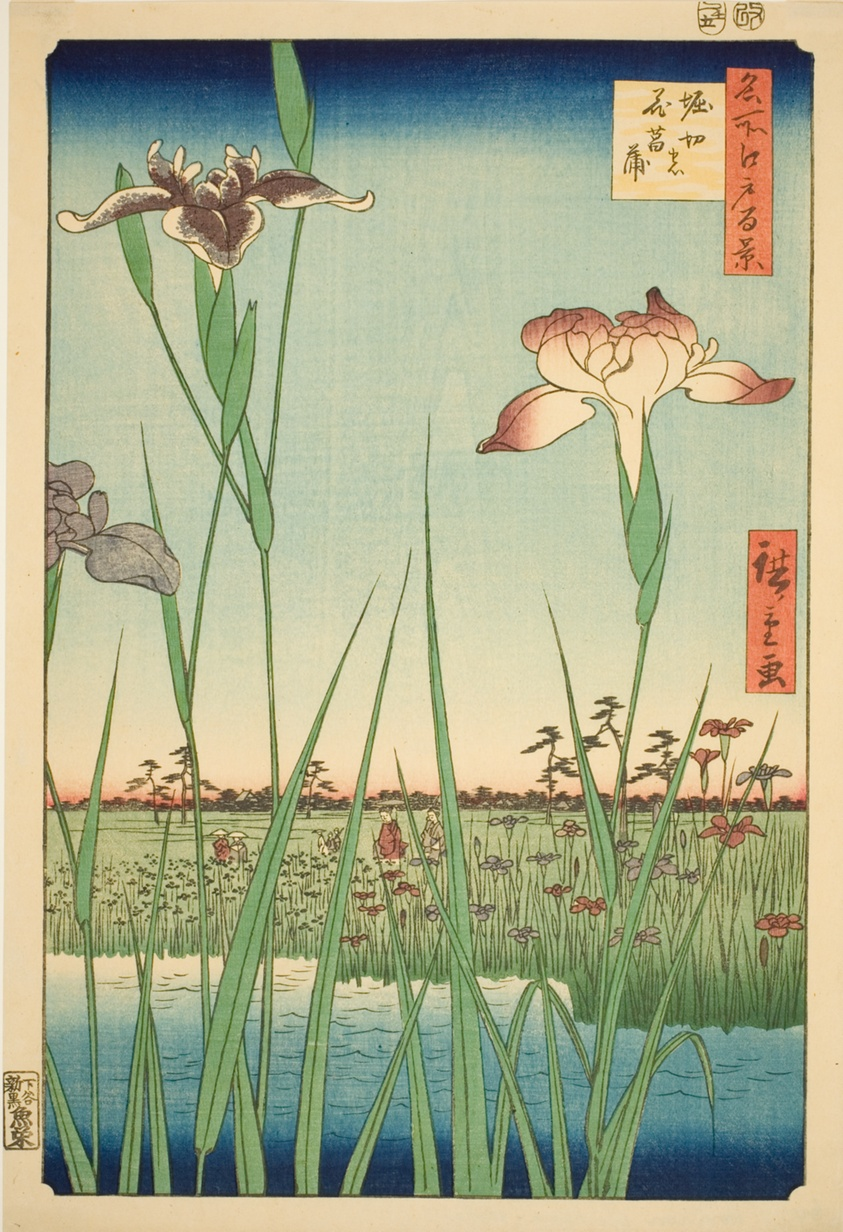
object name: Print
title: Irises at Horikiri (Horikiri no hanashobu), from the series "One Hundred Famous Views of Edo (Meisho Edo hyakkei)"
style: Japanese (culture or style)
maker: Utagawa Hiroshige 歌川 広重; Japanese, 1797-1858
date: 1857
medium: Color woodblock print; oban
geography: Japan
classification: woodblock print; print; asian art